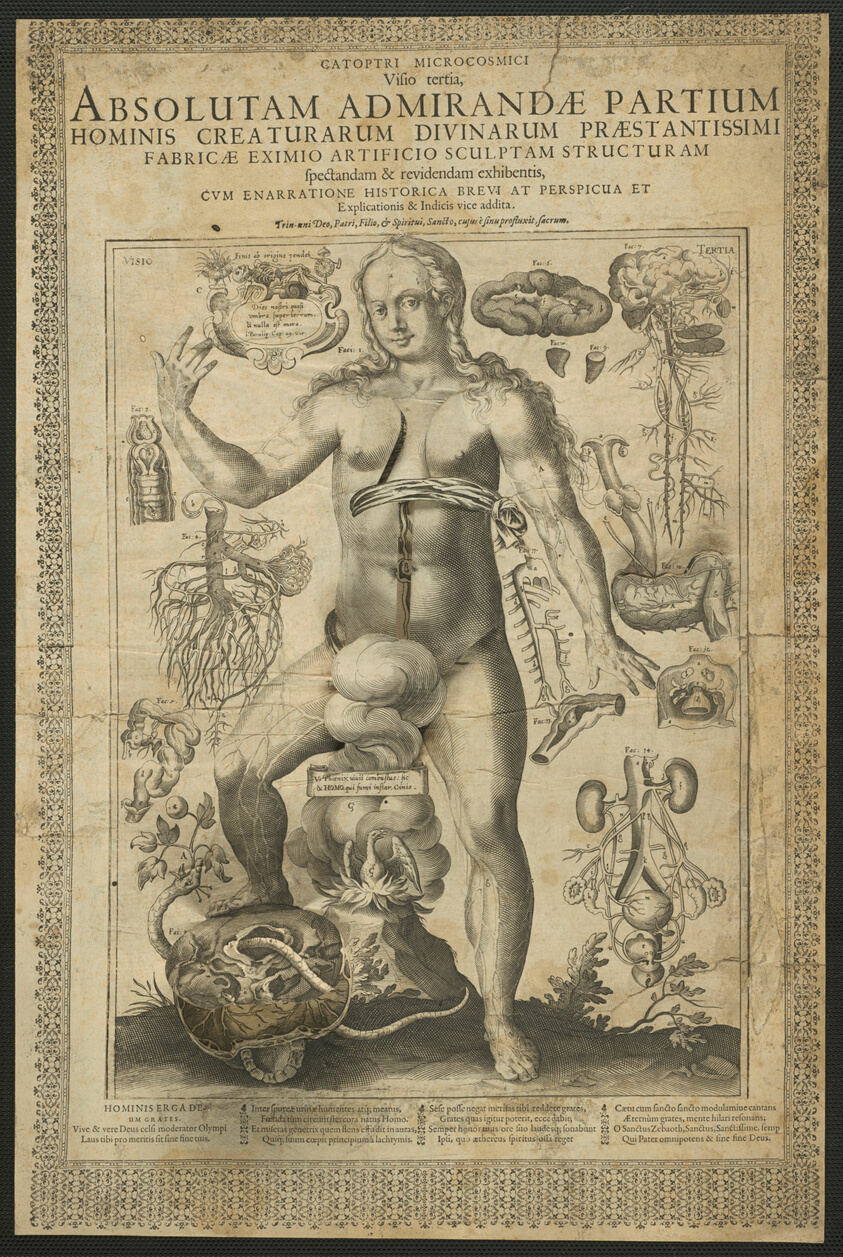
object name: Print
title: Third Vision, from Mirrors of the Microcosm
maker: Lucas Kilian (German, 1579-1637)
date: 1613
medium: Engraving on ivory laid paper (discolored to cream), cut, with etching on ivory laid paper components, laid down on letterpress printed ivory laid paper, and mounted onto cream wove paper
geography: Germany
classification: engraving; print; prints and drawing